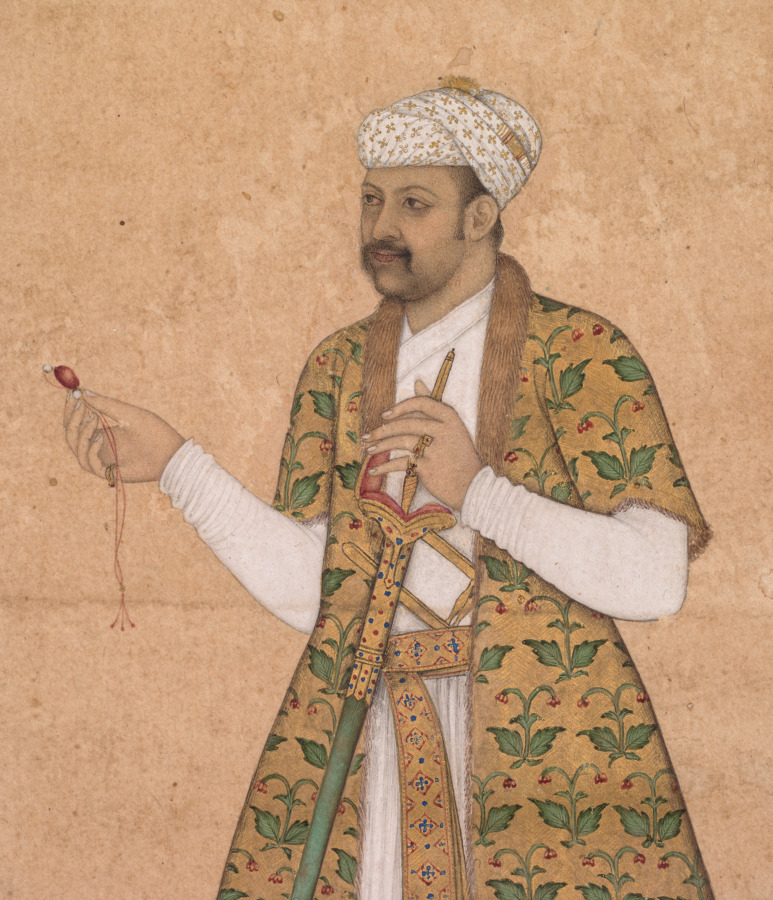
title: A Courtier, Possibly Khan Alam, Holding a Spinel and a Deccan Sword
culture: Mughal India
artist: attributed to Govardhan (Indian, active c.1596–1645)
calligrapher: Abd al-Rahim, the Anbarin-Qalam (Indian, active c. 1590–1630)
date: c. 1605–10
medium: gum tempera, ink, and gold on paper, text on verso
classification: Painting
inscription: Verso: A tahshiyya (marginal addendum) in rhymed prose from the Gulistan (Rose Garden) of Sa‘di (Persian, 1210–1291) and the Nafahat al-Uns (Breaths of Fellowship) of Abd al-Rahman Jami (Persian, 1414–1492), c. 1605, Abd al-Rahim, the Anbarin-Qalam (Indian, active c. 1590–1630), Mughal court; In nast’aliq script: O Lord of the all dominions Praise and thanks to God—may he be honored and glorified!—whose worship brings one closer to him and giving thanks [to him] increases his bounty. [Each breath] that one inhales, prolongs life, and when exhaled a rejuvenation of the soul. Thus each breath contains two blessings, and on each blessing gratitude is due. Who is able, by word or deed, to fulfill the task of paying him due thanks? It is more apt for his slaves to seek at the Divine court pardon for their shortcomings, for what truly is worth his lordship none can render adequately. Persian verses from the Nafahat al-uns quoting a poem by the mystic Sheikh Ruzbihan of Shiraz (Persian, 1128–1209), in nast’aliq script: That which has not been visible to the eye of time; That which has not been audible to the ears of the earth; Has manifested itself in the clay of my being. Come at once and see it in my clay.This page has been written as marginalia to the book Mir’at al-quds [Mirror of Holiness],written by the wretched Abd al-Rahim Anbarin-Qalam, may God forgive his sins.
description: According to Akbar's court historian, the emperor ordered likenesses to be taken of the grandees of his realm. "An immense album was thus formed: those that have passed away have received a new life, and those who are still alive have immortality promised them." Akbar's son and successor, Jahangir (reigned 1605-27), continued the tradition of commissioning works of lifelike portraiture for inclusion in imperial albums. This courtier wears an opulent fur-trimmed, fringed velvet coat over his belted white tunic and striped pants-the typical Mughal dress derived from their roots among the nomadic horse-riding people of Central Asia. The artist has reveled in creating the soft textures of the facial hair, fur and fabrics. He holds a ruby-like gemstone called a spinel, which was prized among the Mughals for its talismanic properties of protection during battle.